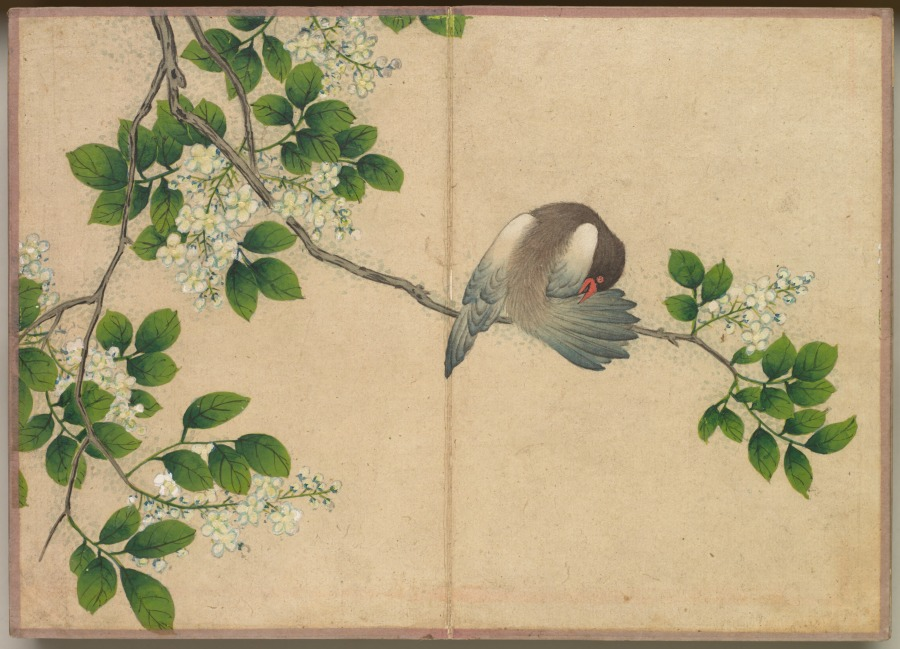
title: Desk Album: Flower and Bird Paintings (Preening Bird)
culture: China, Qing dynasty (1644-1911)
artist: Zhang Ruoai (Chinese, 1713–1746)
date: 1700s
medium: album leaf, ink and color on paper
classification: Painting